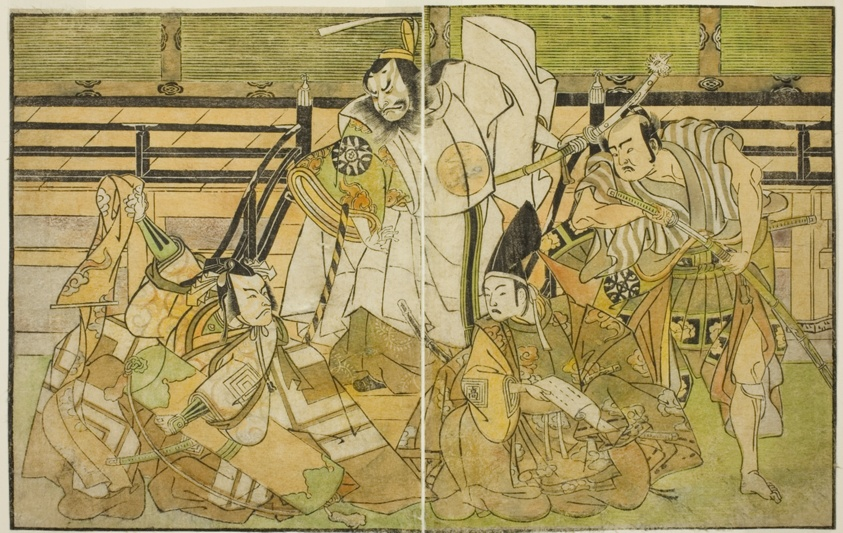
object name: Print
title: The Actors Nakamura Denkuro II as Seno-o Taro, Ichikawa Komazo II as Yorimasa, Nakamura Nakazo I as Taira no Kiyomori, and Ichikawa Danjuro V as Kiou Takiguchi (right to left), in the Play Nue no Mori Ichiyo no Mato, Performed at the Nakamura Theater in the Eleventh Month, 1770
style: Japanese (culture or style)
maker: Katsukawa Shunsho 勝川 春章; Japanese, 1726-1792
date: c. 1772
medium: Color woodblock print; from the illustrated book Yakusha Kuni no Hana (Prominent Actors of Japan)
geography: Japan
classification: woodblock print; print; asian art